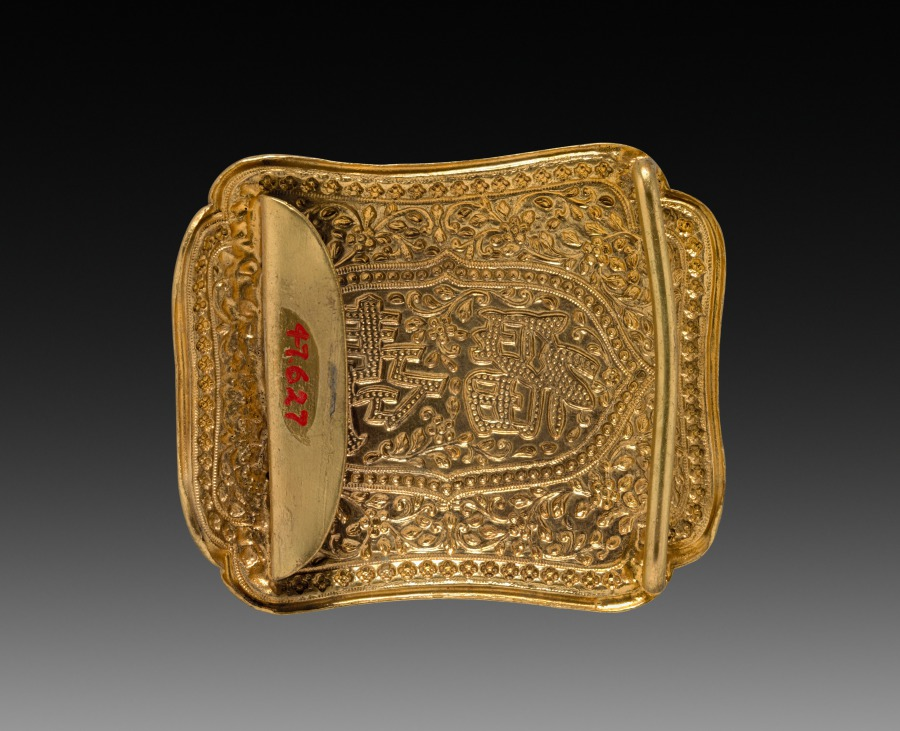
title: Buckle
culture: China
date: 1900s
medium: silver gilt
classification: Jewelry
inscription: 福壽